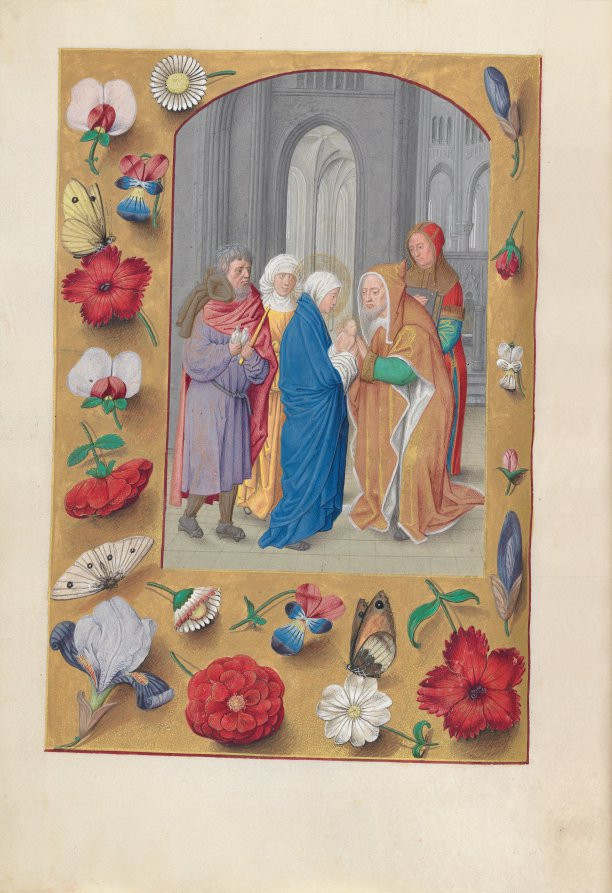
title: Hours of Queen Isabella the Catholic, Queen of Spain: Fol. 141v, Presentation in the Temple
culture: Flanders, Ghent and Bruges, late 15th century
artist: Master of the First Prayerbook of Maximillian (Flemish, c. 1444–1519)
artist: and Associates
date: c. 1500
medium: ink, tempera, and gold on vellum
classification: Bound Volume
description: This manuscript was illuminated by a circle of at least five highly organized manuscript painters active in the Flemish cities of Ghent and Bruges. The principal illuminator was Alexander Bening, who painted the majority of the book's miniatures. Manuscripts produced by this circle of artists are renowned for the decoration of their borders, which typically feature a rich variety of realistically-painted flowers, birds, and butterflies. This prayer book, called a book of hours, was intended not for a cleric, but for the private devotions of a lay person-in this case, Isabella the Catholic, Queen of Spain (1451-1504). Isabella's coat of arms embellishes the book's frontispiece. It is unlikely that the book was commissioned by the Queen herself; rather, she probably received it as a diplomatic gift from someone courting her patronage, perhaps Cardinal Francisco Jimenez de Cisneros. A Franciscan friar, Jimenez was dependent upon Isabella for his advancement, first to the post of Queen's confessor in 1492, and then to Archbishop of Toledo in 1495.